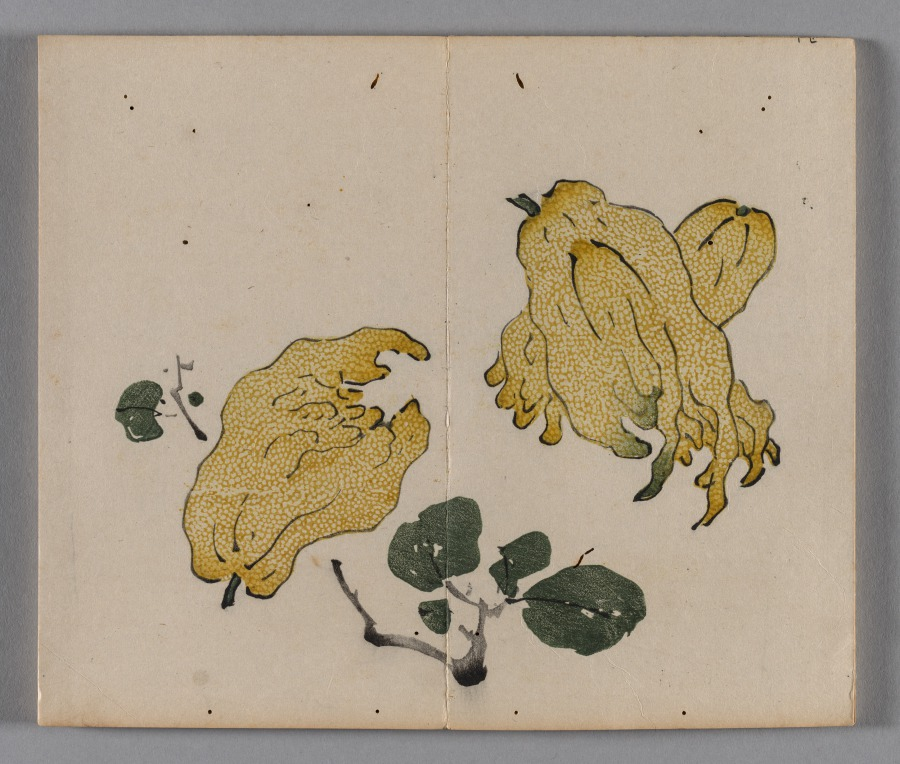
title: Ten Bamboo Studio Painting and Calligraphy Handbook (Shizhuzhai shuhua pu): Fruit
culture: China, Qing dynasty (1644-1911)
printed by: Hu Zhengyan (Chinese, c. 1584–1674)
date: 1633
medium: Woodblock-printed book; ink and colors on paper; first edition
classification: Print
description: Color printing reached a level of perfection in the early 1600s, as seen in this Ten Bamboo Studio Collection of Calligraphy and Painting and the Mustard Seed Garden Manual of Painting (printed 1679 and 1701). The painterly quality, precision in registering (aligning) the woodblocks, and harmonious colors made them the most successful color print editions in Chinese history. Both editions were printed and compiled in Nanjing, spread nationwide, and had a great impact on the arts in Japan and Korea.